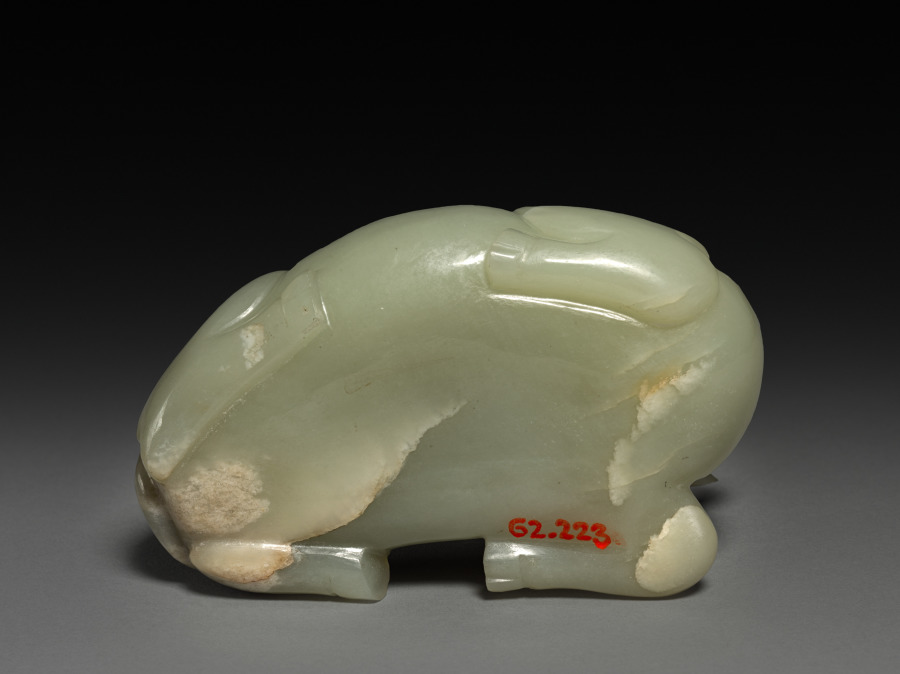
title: Reclining Water Buffalo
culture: China, Qing Dynasty (1644-1911), Kangxi reign (1642-1722)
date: 1642–1722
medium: Jade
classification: Jade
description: In the Ming (1368–1644) and Qing (1644–1911) dynasties, luxury items became more affordable to larger parts of the society, including women, merchants, and literati in non-official positions. Imperial patronage and a growing urban population encouraged consumption of luxury goods and local craftmanship. This jade buffalo illustrates the superb carving skills and the creative mind of its accomplished creator, who sought clients on a competitive market.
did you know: This jade buffalo may have been used as a paperweight on a scholar's desk.